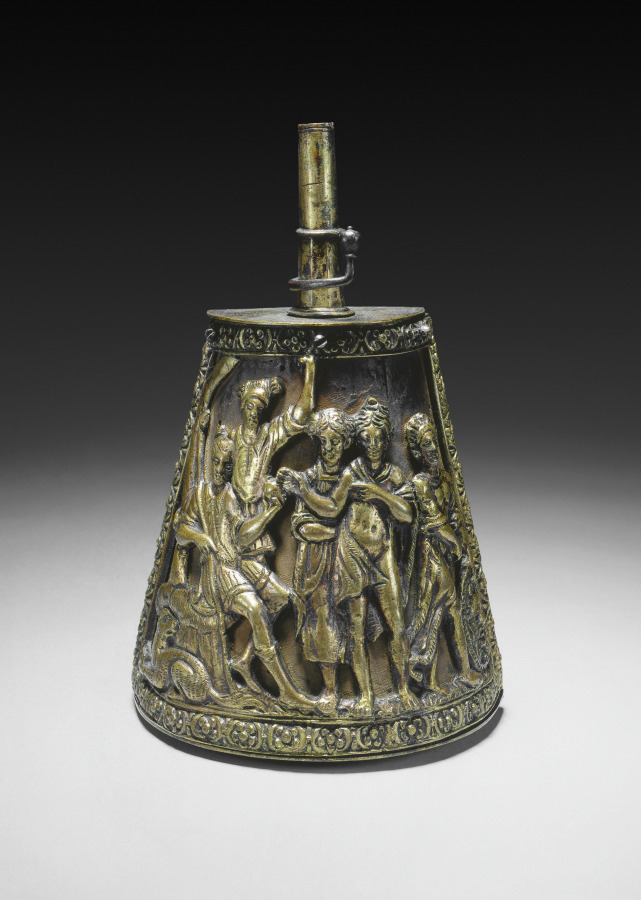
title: Powder Flask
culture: Italy, 16th century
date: c. 1590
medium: gilt brass over fabric covered wood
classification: Arms and Armor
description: Luxury powder flasks served as highly visible badges of ranks. Many highly decorated flasks, like this example, embody all the allure and characteristics of a work of art. This flask depicts an ancient Greek story in which the youthful Paris must reward the most beautiful woman in the world with a golden apple.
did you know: This powder flask depicts a mythological scene that precipitated the Trojan War. Here we see the Trojan prince Paris giving a golden apple to Aphrodite, the goddess who reciprocates by offering him the most beautiful woman in the world, Helen of Sparta.